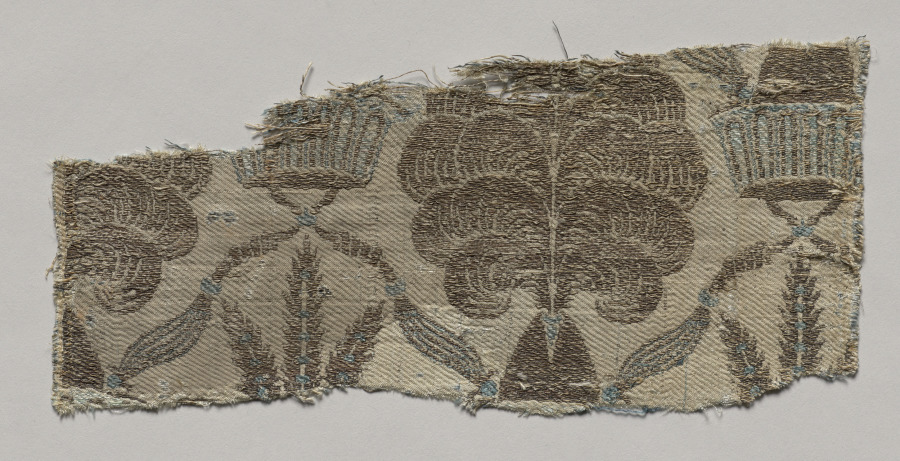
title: Silk Fragment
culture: Italy, last third of the 14th century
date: 1360–1399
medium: lampas weave, silk and gold thread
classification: Textile